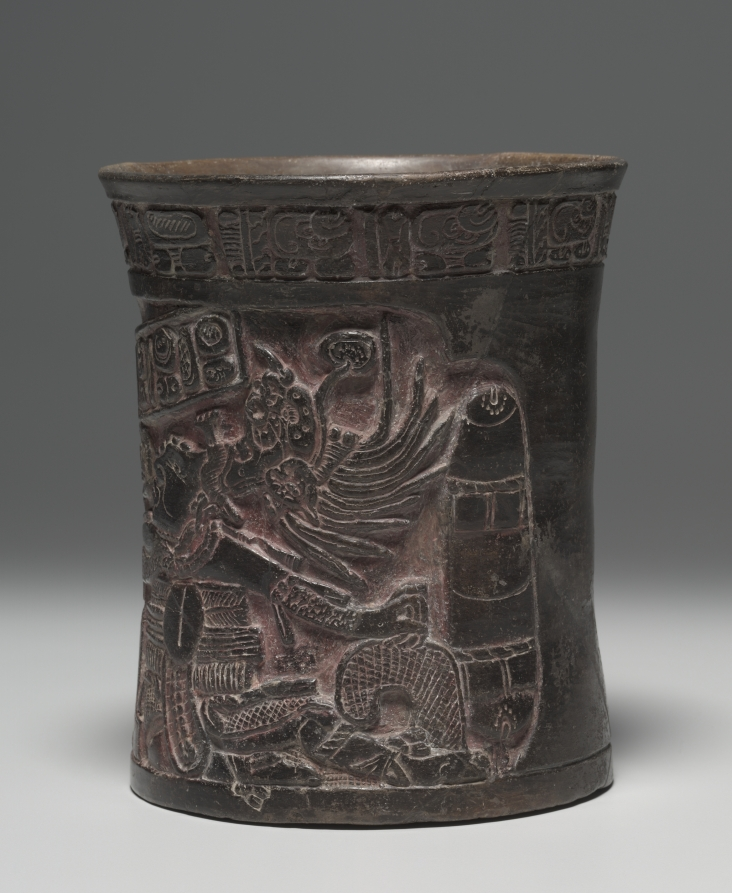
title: Vessel with Ballplayer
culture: Mexico, Yucatán, Maya (Chocholá) style (250-900)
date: c. 600–1000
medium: earthenware, pigment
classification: Ceramic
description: Many Mesoamerican people played ball games, using their hips rather than hands and feet to keep the heavy, solid rubber ball in play. Here a Maya ballplayer, wearing a thick protector to shield his torso from injury, dives to intercept the ball, which hovers in front of his face. The scene is situated within stepped walls, probably those of a ball court.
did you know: This vessel was once broken into 34 pieces before being repaired.